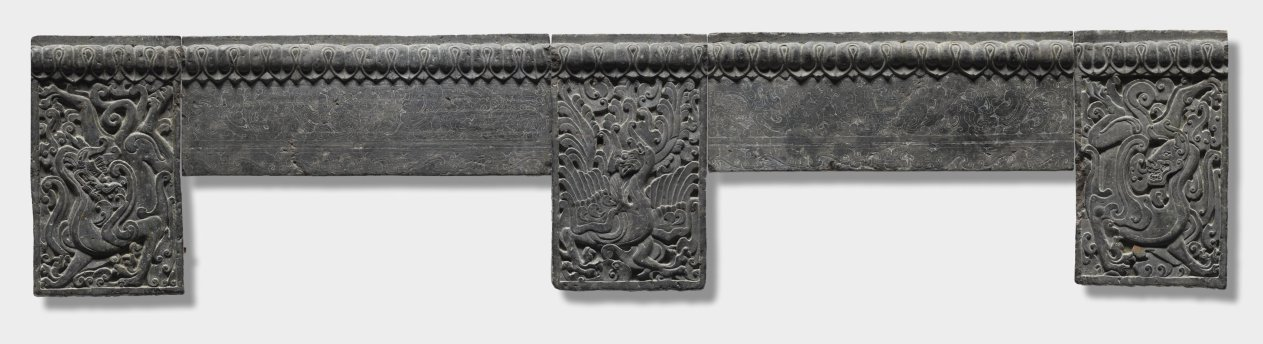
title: Sections of a Coffin Platform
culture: China, Northern Qi dynasty (550-577)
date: 550–577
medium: limestone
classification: Sculpture